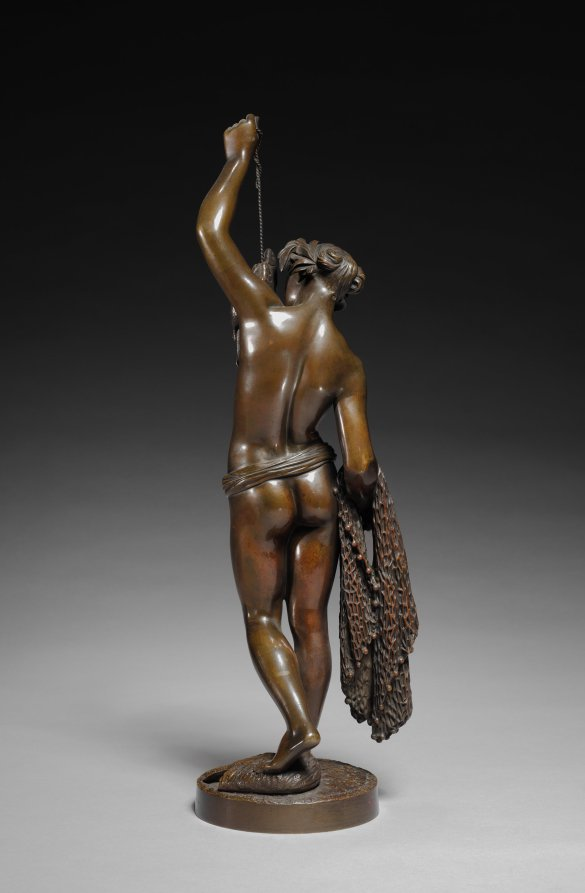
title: Allegory of Fishing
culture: France, 19th century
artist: James Pradier (Swiss, 1790–1852)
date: c. 1840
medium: bronze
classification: Sculpture